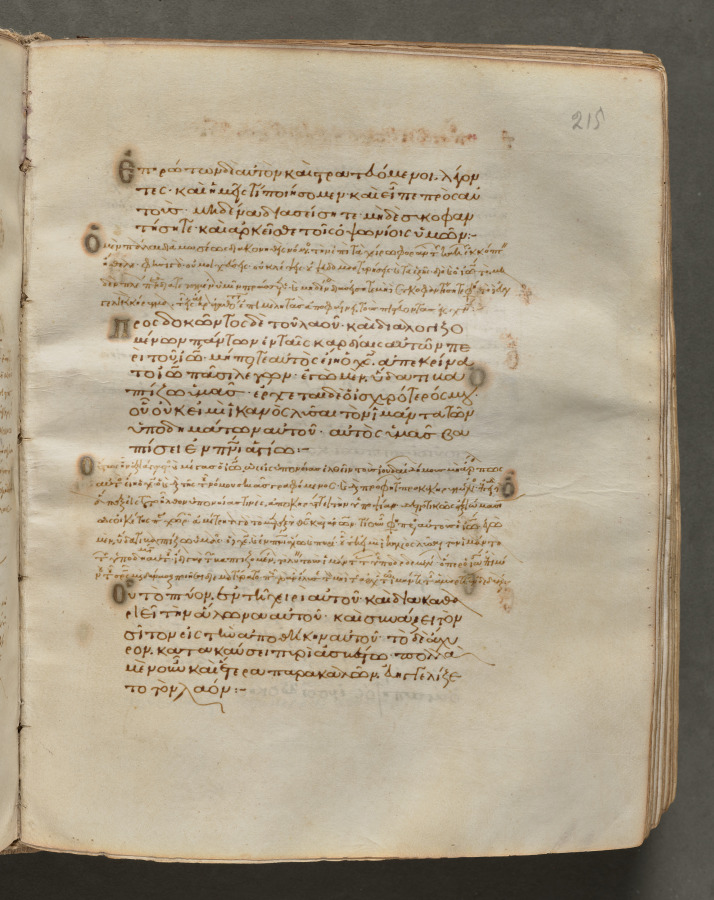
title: Text, folio 215 (recto), from a Gospel Book with Commentaries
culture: Byzantium, Constantinople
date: c. 1000–1100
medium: ink, tempera, and gold on vellum; leather binding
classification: Bound Volume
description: Each of the four gospels in this book opens on a page with brilliantly illuminated borders depicting the author of the text as well as birds-principally peacocks, symbols of the immortality of the soul-and fountains, representing the fountain of life and the salvation of the soul. This volume consists of 428 leaves with texts in Greek. Its level of sophistication suggests that it was probably written and decorated in a monastery in Constantinople.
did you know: Gospel Books were carried in procession through Byzantine churches.